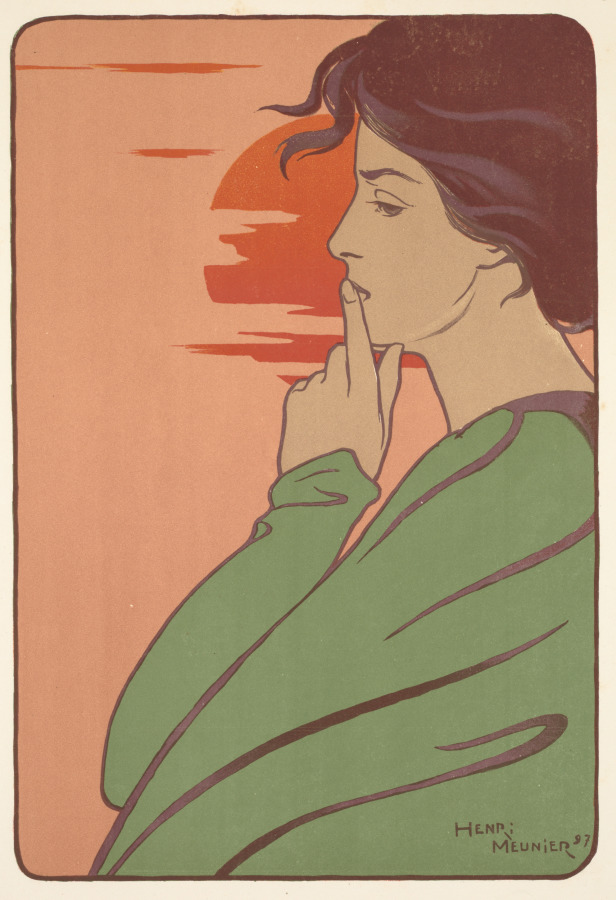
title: L'Heure du silence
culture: Belgium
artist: Henri Georges J. I. Meunier (Belgian, 1873–1922)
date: 1897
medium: color lithograph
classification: Print